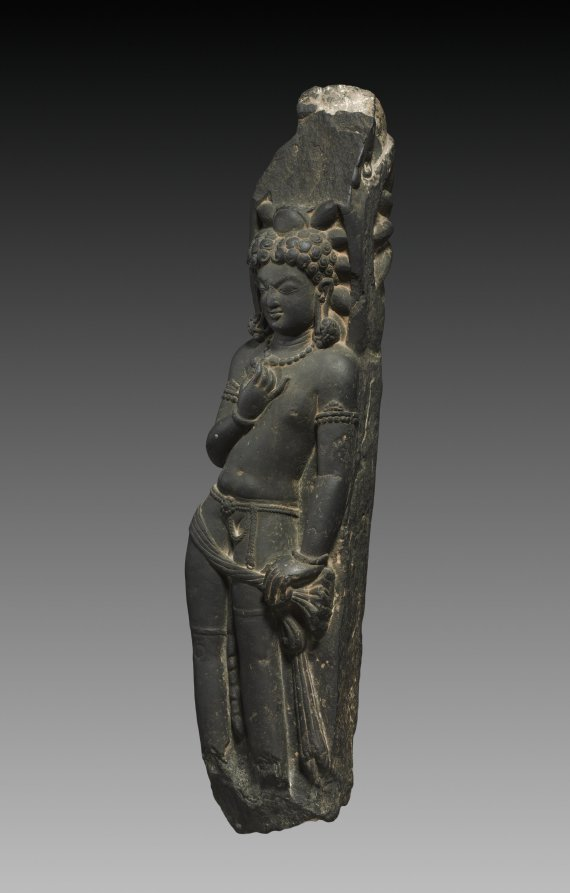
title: Personification of the Discus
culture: Northeastern India, Bihar, Aphsad, early Pala period, 7th Century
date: 670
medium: chlorite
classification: Sculpture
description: Vishnu's main weapon is the discus, or chakra in Sanskrit. Vishnu's chakra is a wheel that is a metaphor for true knowledge, which he uses in mythic battles to slice demons who stand for ignorance and self-centered arrogance. Iconic images of Vishnu show him as four-armed, with a discus in one hand; sometimes the discus is personified. This personification, with the chakra behind his head, has broken away from the main image of Vishnu. Stylistically this sculpture retains memories of the Gupta styles, with the lush ringlets of hair curling from a central part, the relatively simple adornments, and the soft contours of the body. The exaggerated facial expression and figural proportions indicate a transition to a later period.